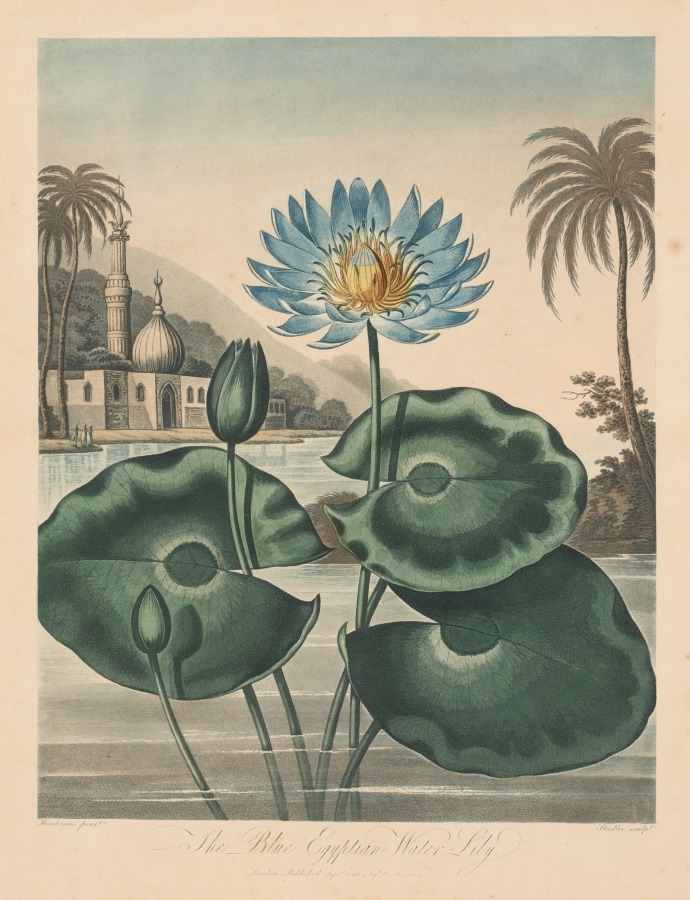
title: The Temple of Flora, or Garden of Nature: Blue Egyptian Waterlily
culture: England, early 19th Century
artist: Robert John Thornton (British, 1768–1837)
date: 1804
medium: aquatint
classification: Print